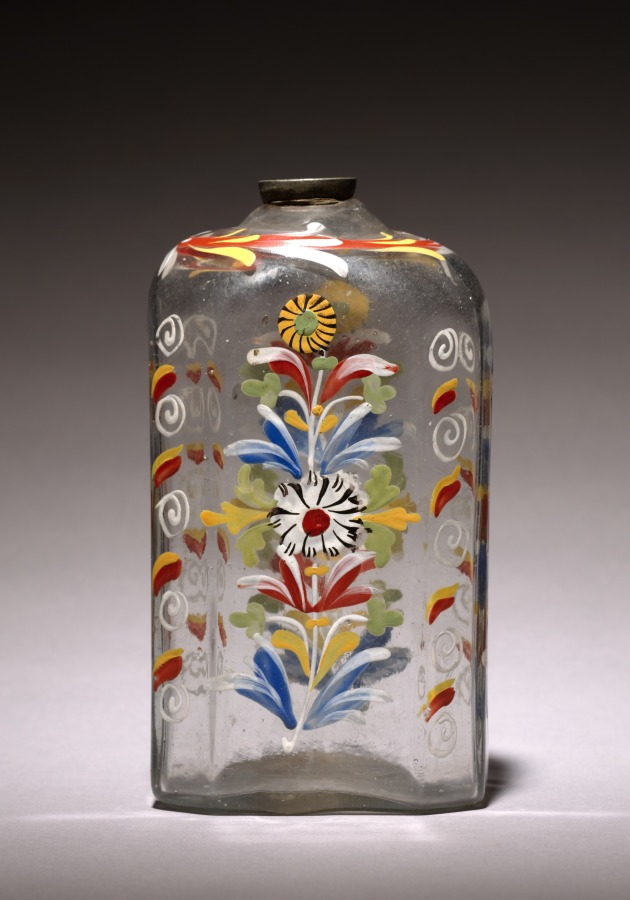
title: Enameled Bottle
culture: America, Stiegel Type, 18th century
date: 1700s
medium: glass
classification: Glass